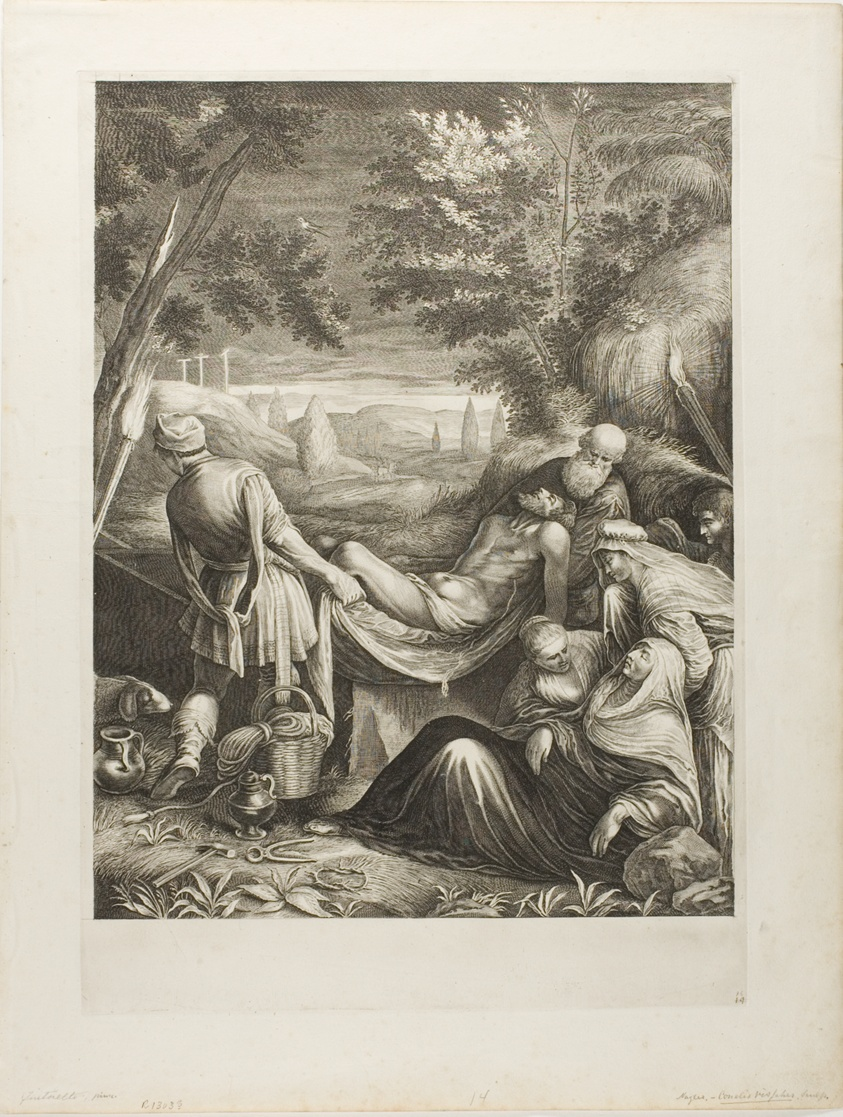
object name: Print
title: The Entombment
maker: Jeremias Falck (Polish, c. 1610-1644/77); after Jacopo Bassano (Italian, c. 1510-1592)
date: c. 1655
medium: Engraving on ivory laid paper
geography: Holland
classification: engraving; print; prints and drawing